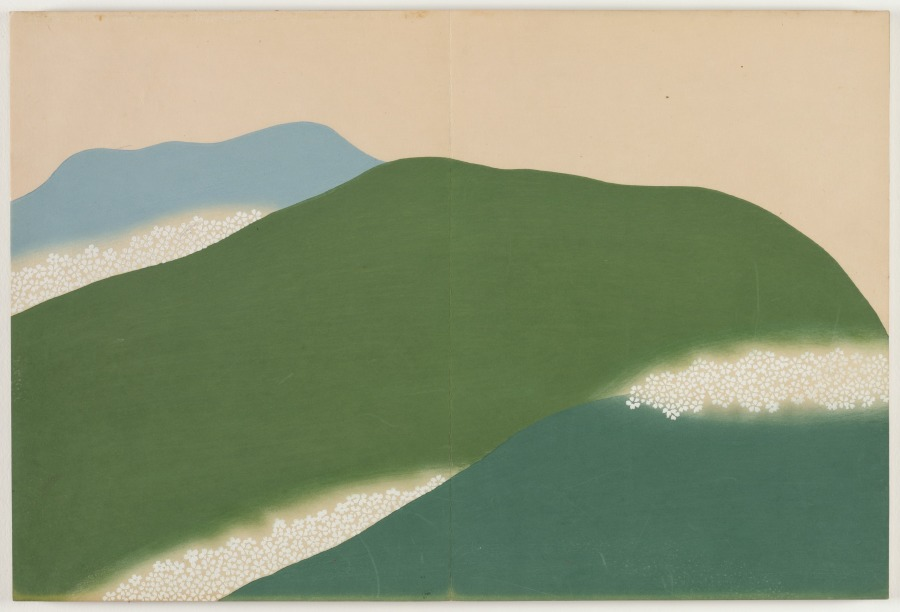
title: Flowers of a Hundred Worlds (Momoyogusa): Yoshino (Yoshino)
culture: Japan, Meiji period (1868–1912)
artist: Kamisaka Sekka (Japanese, 1866–1942)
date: 1909–10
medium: color woodcuts with gold and silver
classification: Bound Volume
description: This print from a set of three woodblock printed albums displays the graphic design prowess of Kamisaka Sekka. The images were first distributed one by one to subscribers to the series but later were reissued in bound form, like this book, for mass consumers. Each print features a vignette taken from nature or Japanese literature. Many of the scenes have a long history in Japan, originating in the 900s or 1000s and having been interpreted by all manner of artists since that time. Sekka’s selections hew closely to precedents from the Rinpa style originated by painter Tawaraya Sōtatsu (c. 1570–c. 1640) and calligrapher Hon’ami Kōetsu (1558–1637).